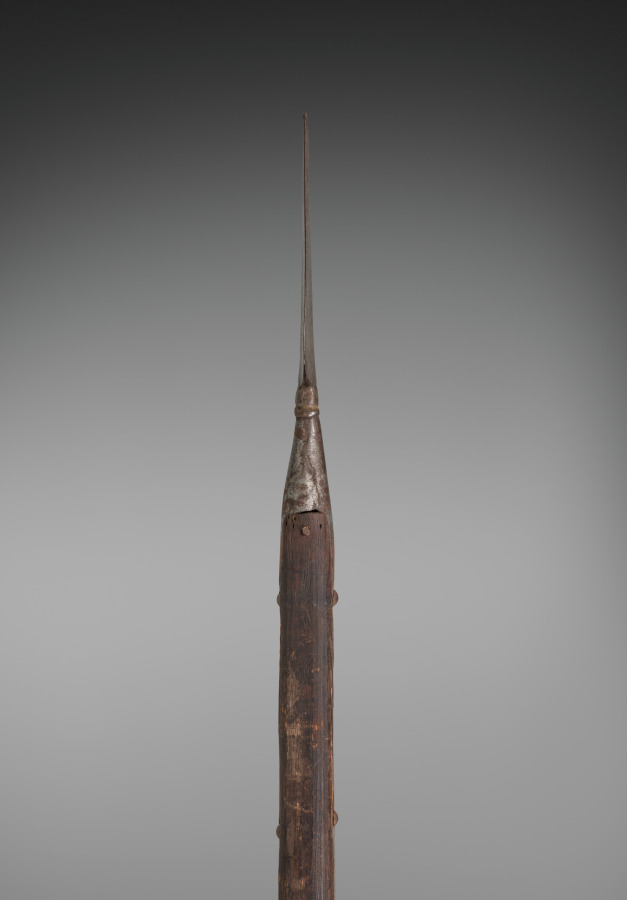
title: Banner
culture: Switzerland, Savoyard, 17th century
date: 1600s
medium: silk ground, small steel lance head on shaft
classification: Arms and Armor